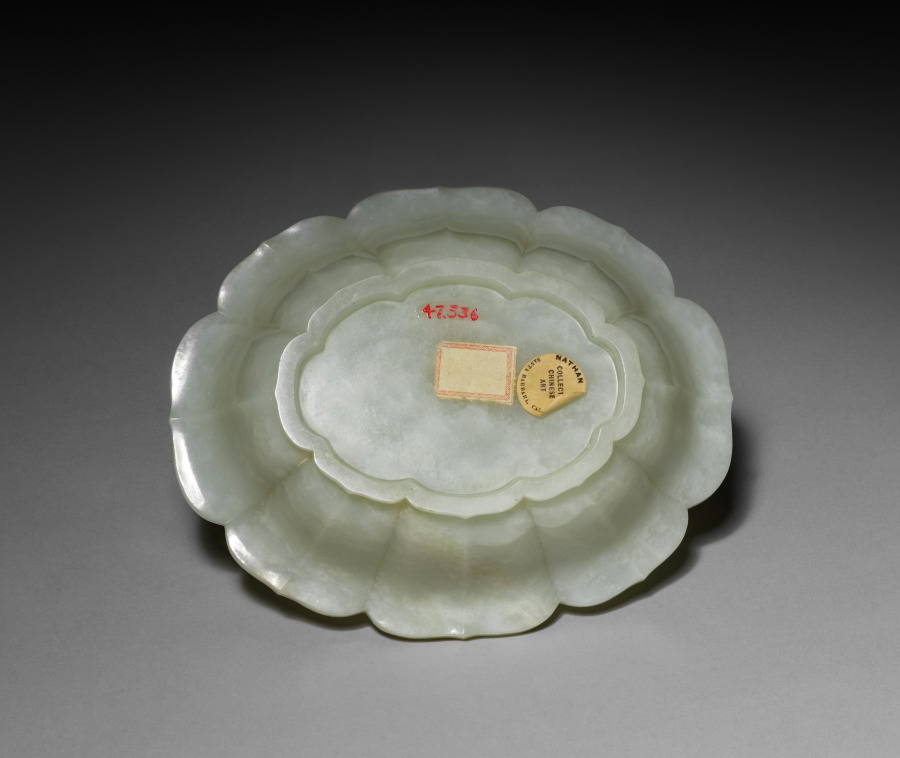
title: Octofoil Dish with Three Boys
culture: China, Qing dynasty (1644–1911), Qianlong reign (1736–95)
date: 1700s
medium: jade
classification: Jade